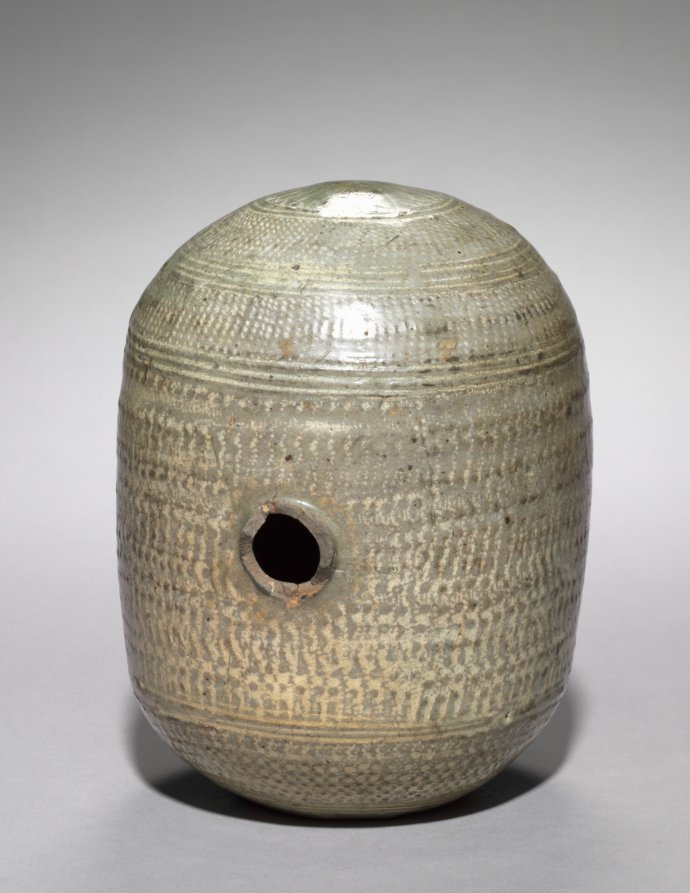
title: Wine Cask with Stamped Floral Decoration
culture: Korea, Joseon dynasty (1392–1910)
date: 1400s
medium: pottery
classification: Ceramic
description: A cask-shaped vessel, such as this work, is believed to have stored different kinds of liquids, including wine, sesame oil, and even water. Having its small mouth in the middle made it useful for not only storing a beverage but also carrying it to a ritual or ceremonial site. To make this work, the artist first applied white slip, then used inlaid and stamped techniques as decorative patterns. Such repetitive and tactile expressions inspired many Korean modern and contemporary ceramic artists in response to the global trend of Abstract Expressionism.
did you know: In order to transfer liquid safely without spilling, the mouth of this vessel is small and placed in the middle.